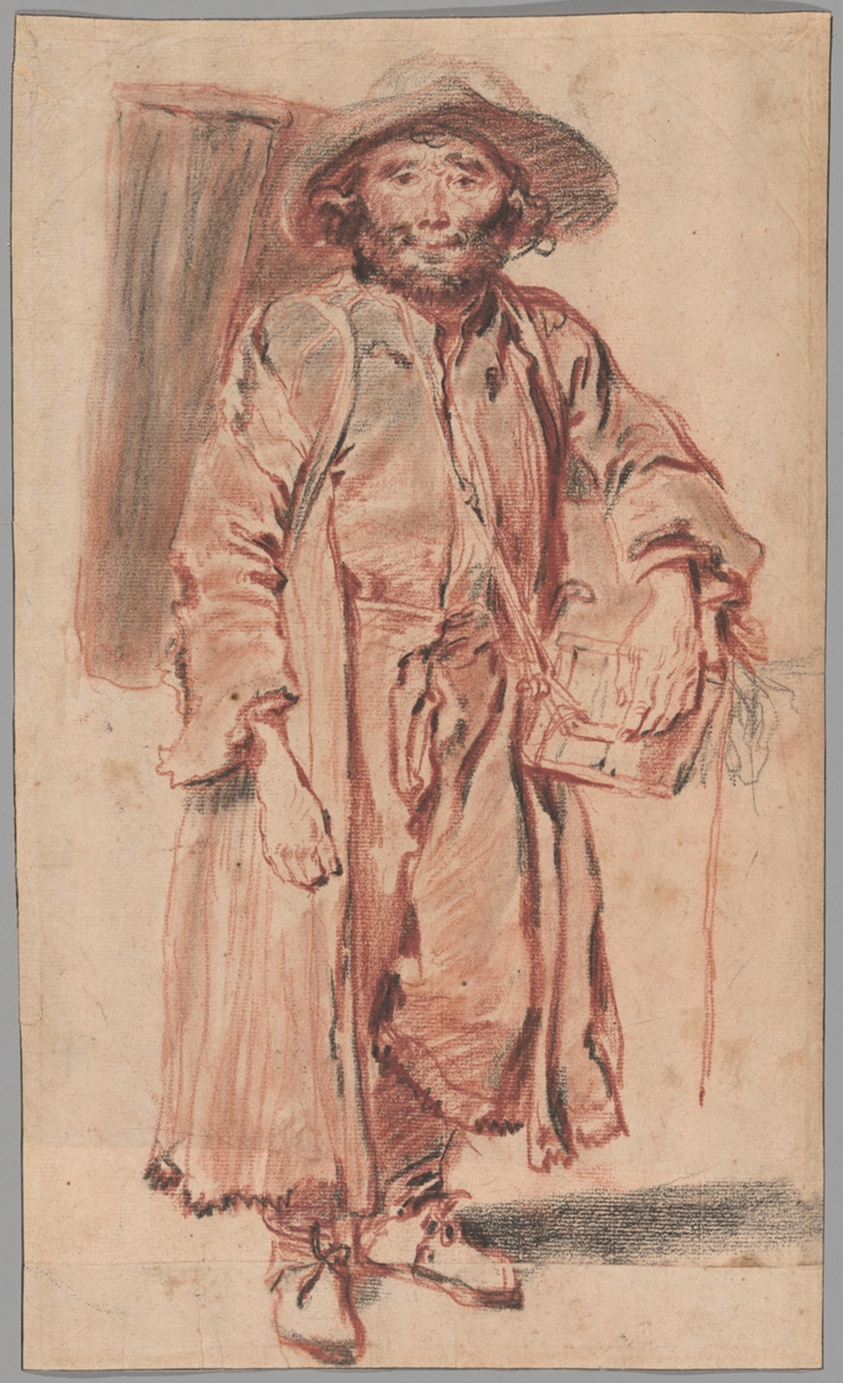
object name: Drawing and Watercolor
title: The Old Savoyard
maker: Jean Antoine Watteau (French, 1684-1721)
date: c. 1715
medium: Red and black chalk on cream laid paper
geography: France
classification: chalk; drawings (visual works); prints and drawing; paper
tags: Savoy, men, poverty, performers, beards